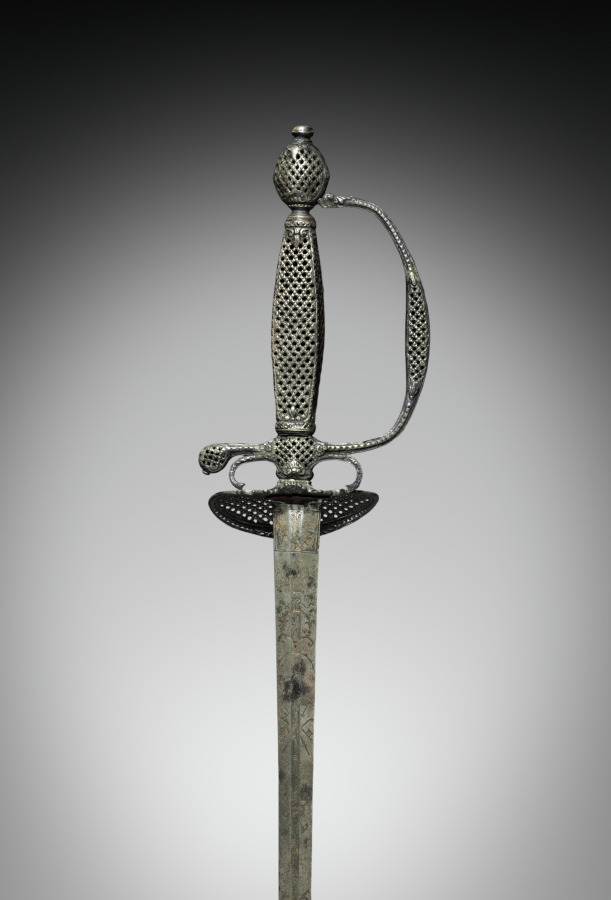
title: Child's Sword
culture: France, Paris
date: c 1780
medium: stainless steel, silver and brass wire inlay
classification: Arms and Armor